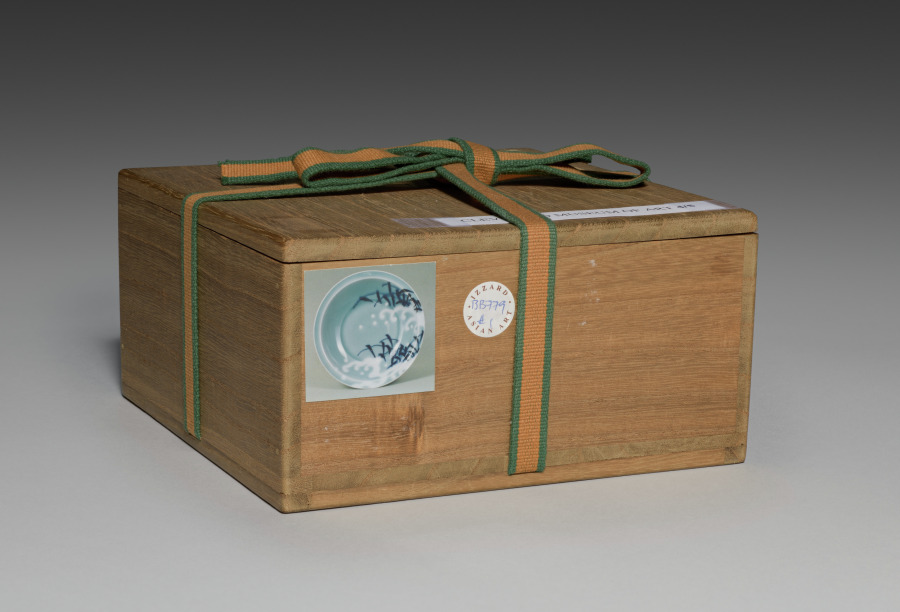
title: Small Dish (Kozara) with Waves and Reeds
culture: Japan, Edo period (1615–1868)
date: late 1600s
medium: Porcelain with underglaze blue and celadon (Hizen ware, Nabeshima type)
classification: Ceramic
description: This dish has a green glaze often called celadon in English.